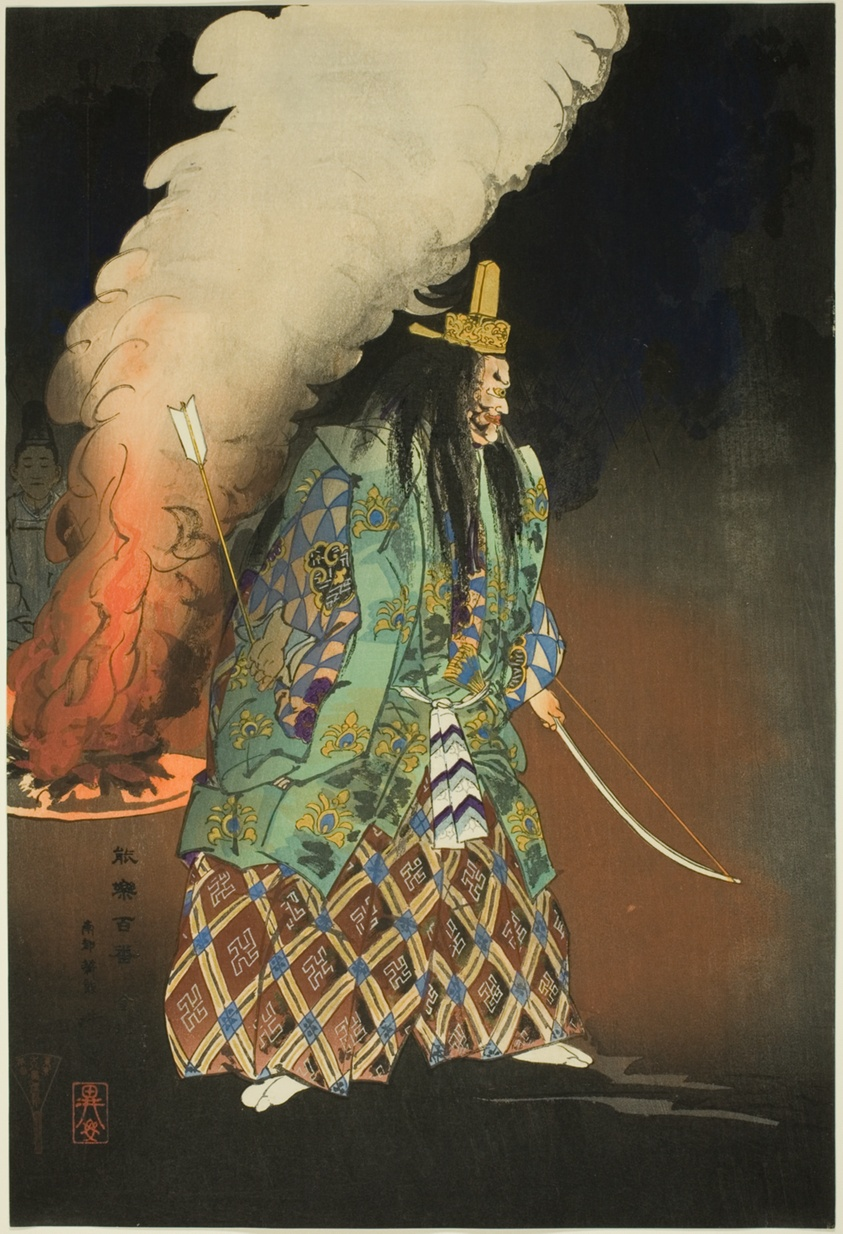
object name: Print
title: Scene of a No Drama: The Gold Charms, from the series "One Hundred No Dramas (Nogaku hyakuban)"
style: Japanese (culture or style)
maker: Tsukioka Kogyo; Japanese, 1869-1927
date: 1898/1903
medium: Color woodblock print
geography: Japan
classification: woodblock print; print; asian art